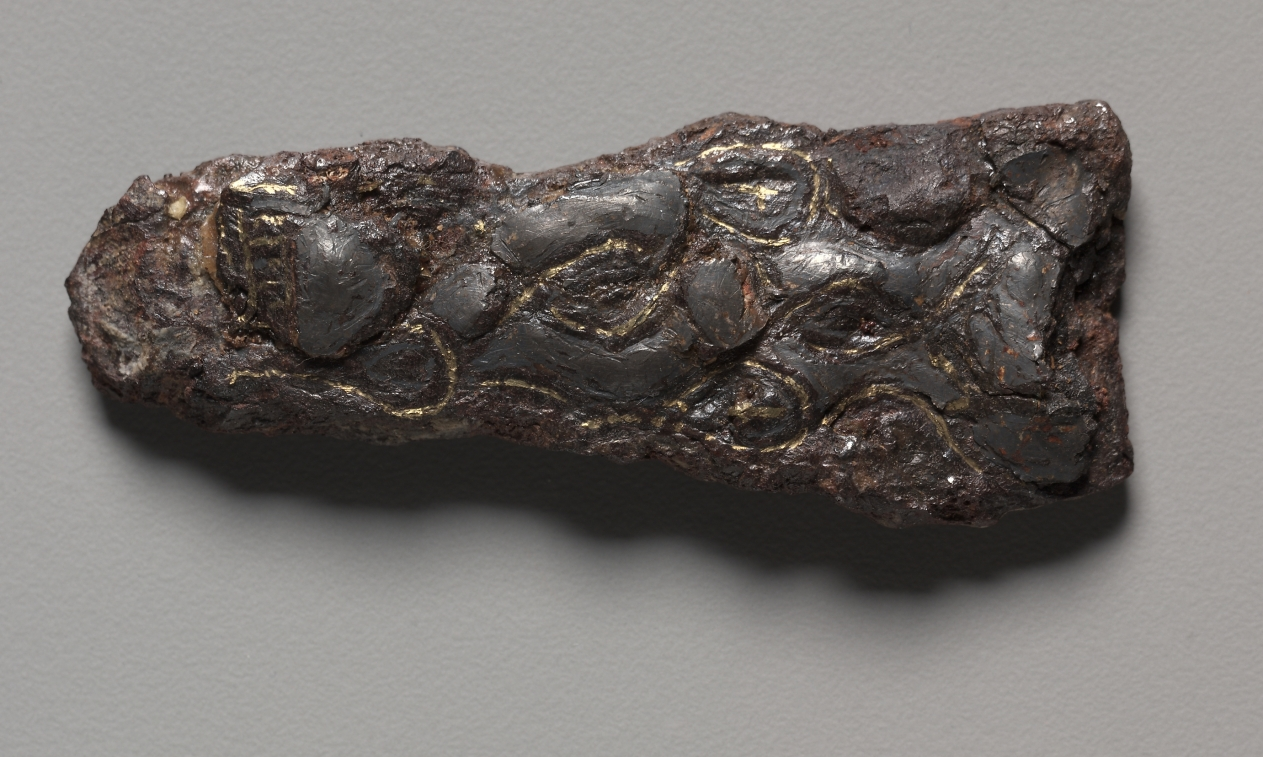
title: Buckles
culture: Merovingian, Burgundian, Migration period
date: 600s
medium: iron with silver overlay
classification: Jewelry